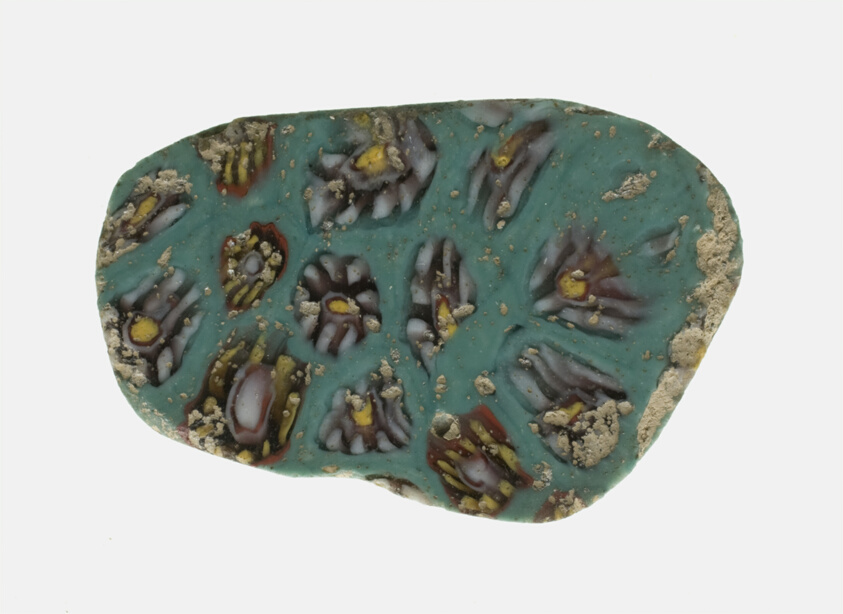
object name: Decorative Arts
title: Fragment of a Plate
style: roman (ancient, style or period), ancient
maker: Roman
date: 1st century BCE–1st century CE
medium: Glass, mosaic glass technique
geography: Roman Empire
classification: fragment; decorative arts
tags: decoration